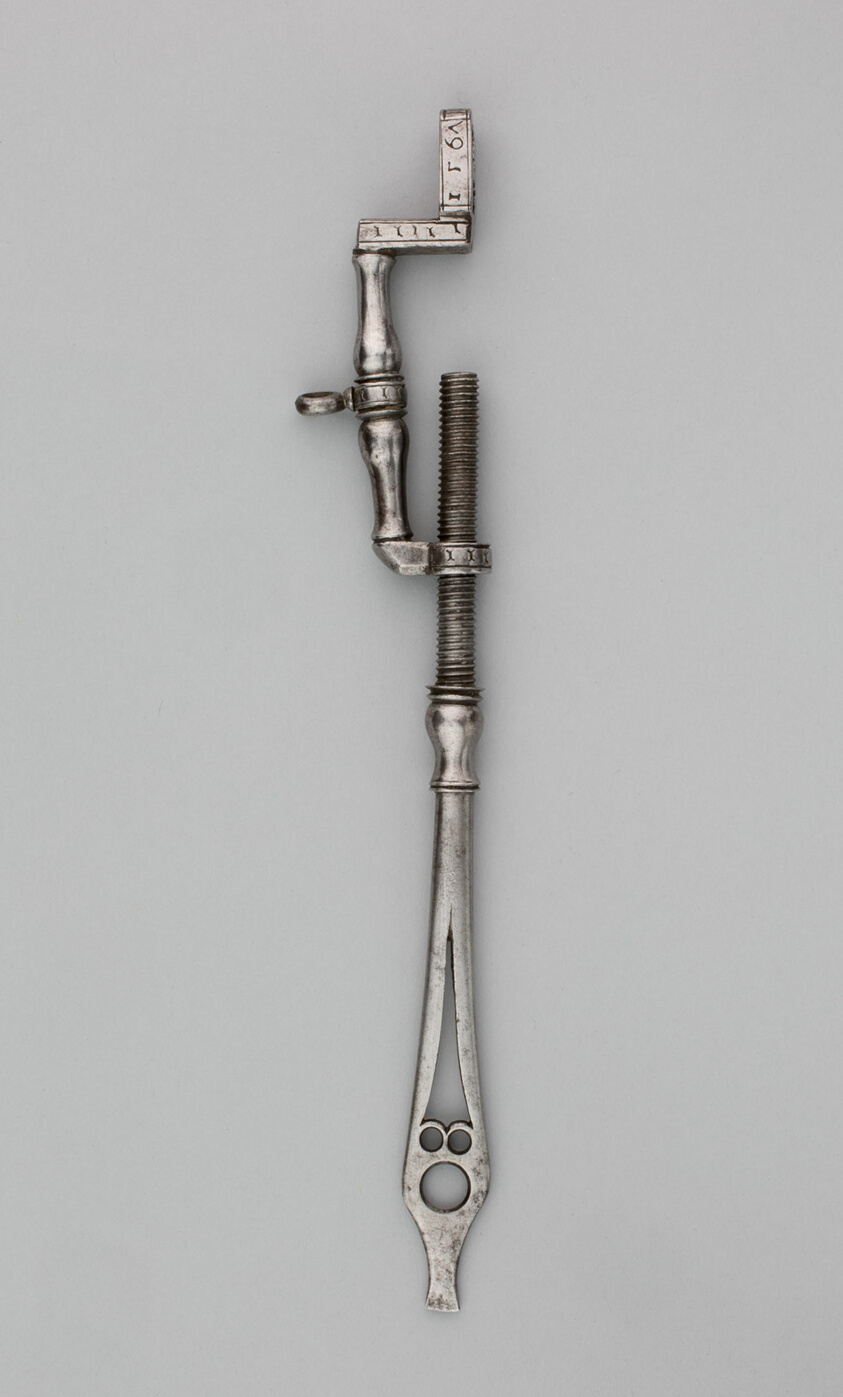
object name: Arms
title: Wheel-Lock Spanner Combined with Screwdriver and Spring Clamp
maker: German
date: 1567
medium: Steel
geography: Germany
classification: firearm-accessory; arms; arms and armor